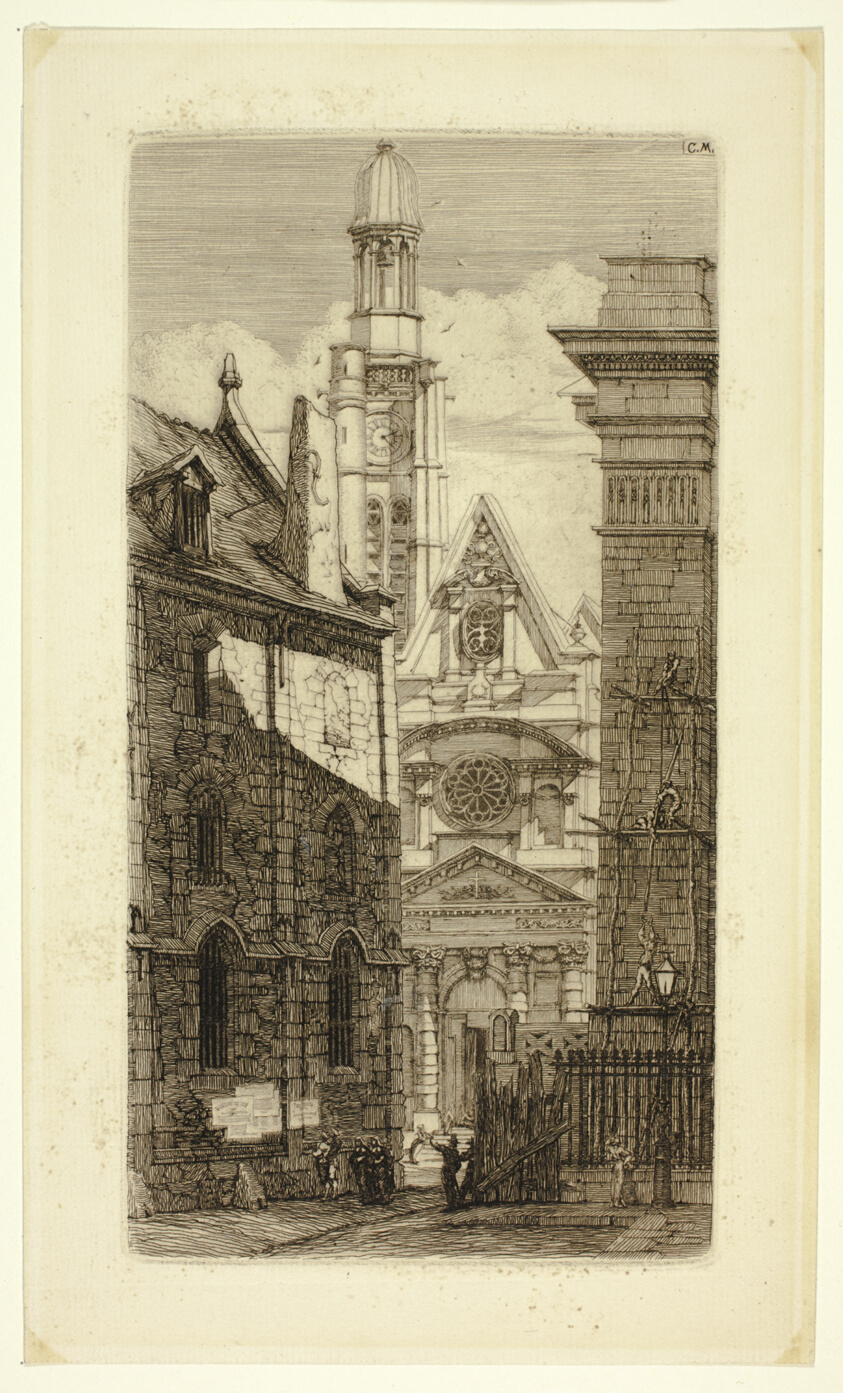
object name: Print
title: Saint-Etienne-du-Mont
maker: Charles Meryon (French, 1821-1868)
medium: Etching on paper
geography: France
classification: etching; print; prints and drawing